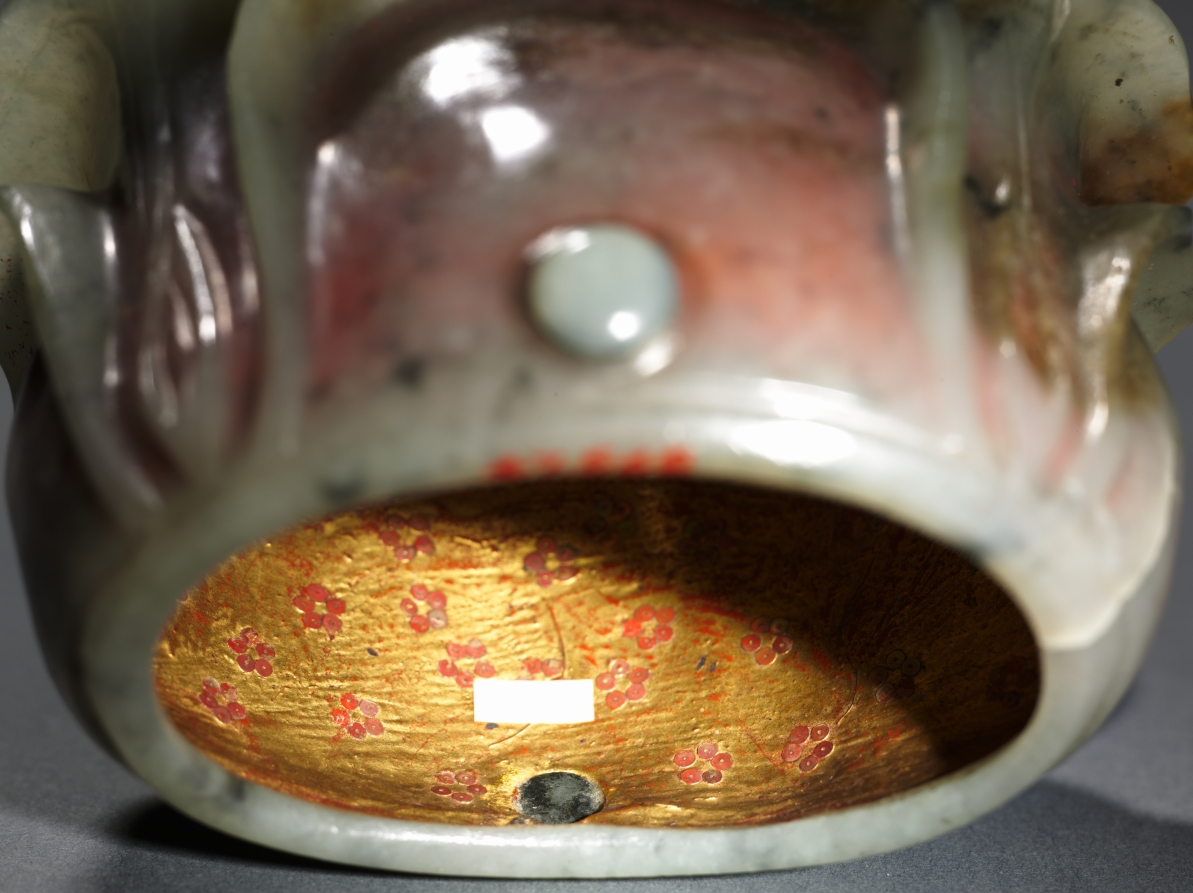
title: Daoist Cap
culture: China, Song dynasty (960-1279) - Yuan dynasty (1271-1368)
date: 960–1279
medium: grayish-green jade with brown and black markings; interior with pink pigment and gold inlays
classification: Jade